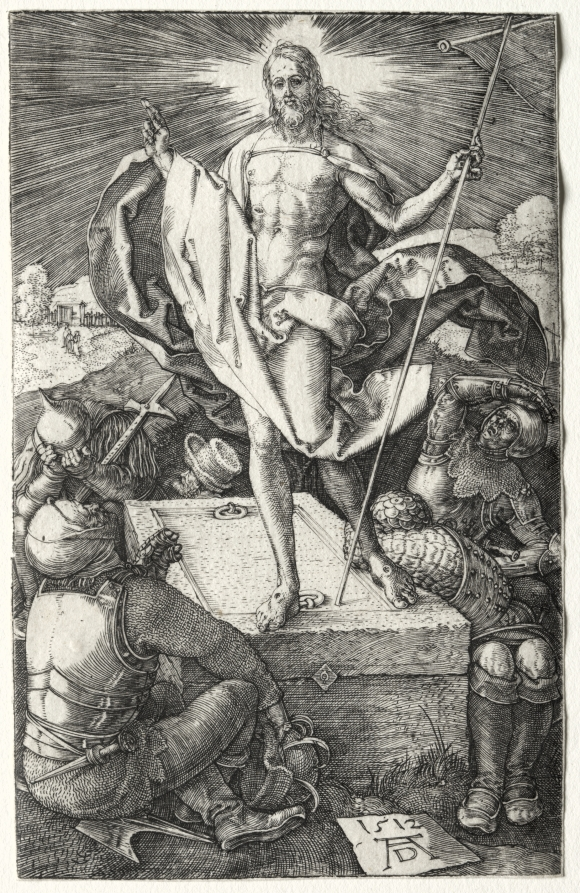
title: The Resurrection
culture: Germany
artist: Albrecht Dürer (German, 1471–1528)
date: 1512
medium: engraving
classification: Print